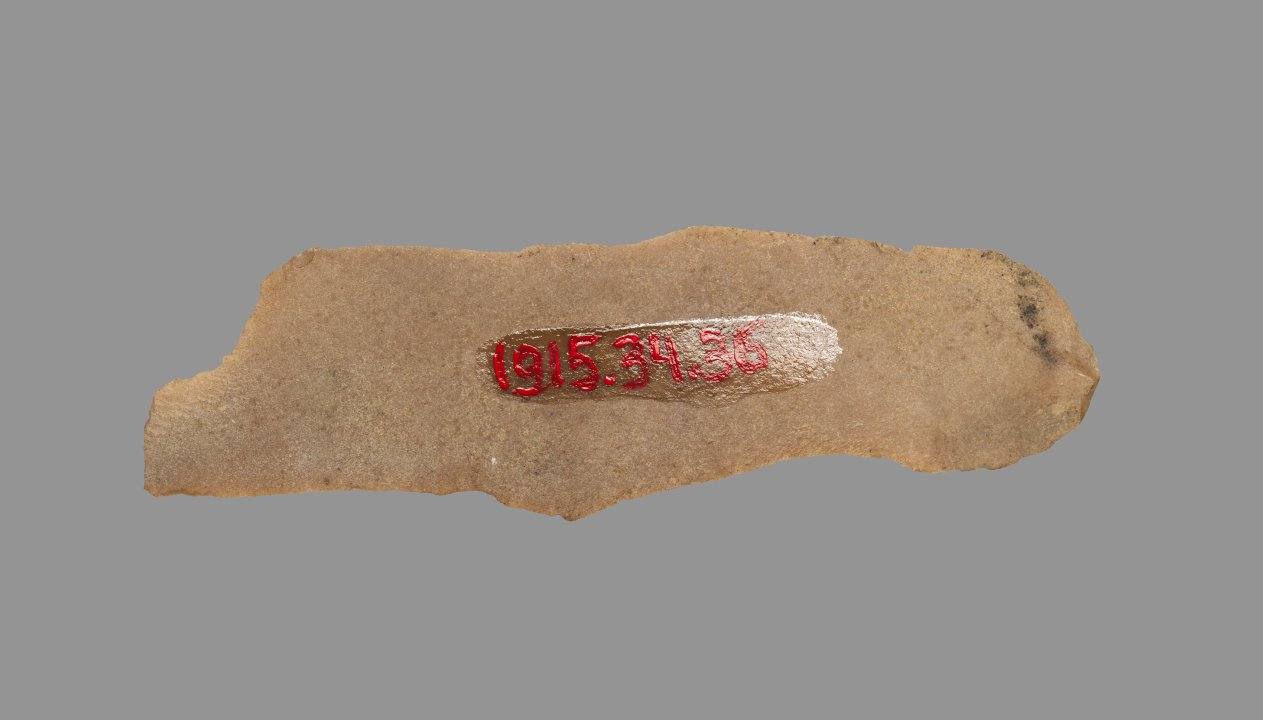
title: Sickle Blade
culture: Egypt, Middle Kingdom (2040–1648 BCE), Dynasty 12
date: 1980–1801 BCE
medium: flint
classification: Implements